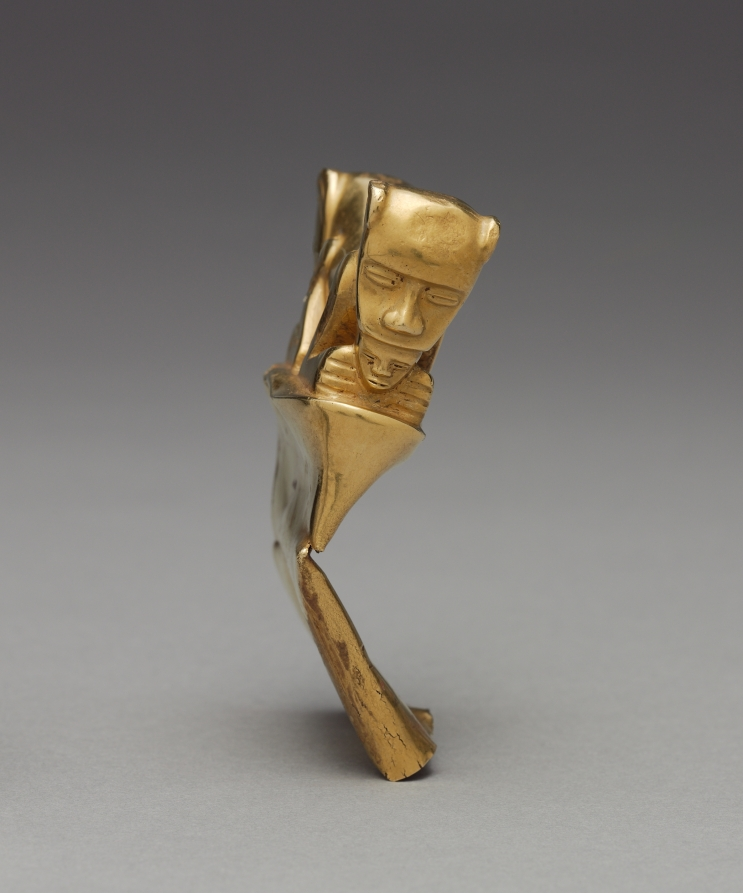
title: Staff Head(?)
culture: Colombia or Panama, International style, 5th-8th Century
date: c. 400–700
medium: cast gold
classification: Metalwork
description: The two-headed beast that crouches on the top of this object-perhaps a staff finial (head)-holds a human head or perhaps a mask between its paws. The silken surface and simple, elegant design identify the finial as of the International style, so-called because it crossed ancient boundaries and is found in Colombia as well as Costa Rica and Panama.